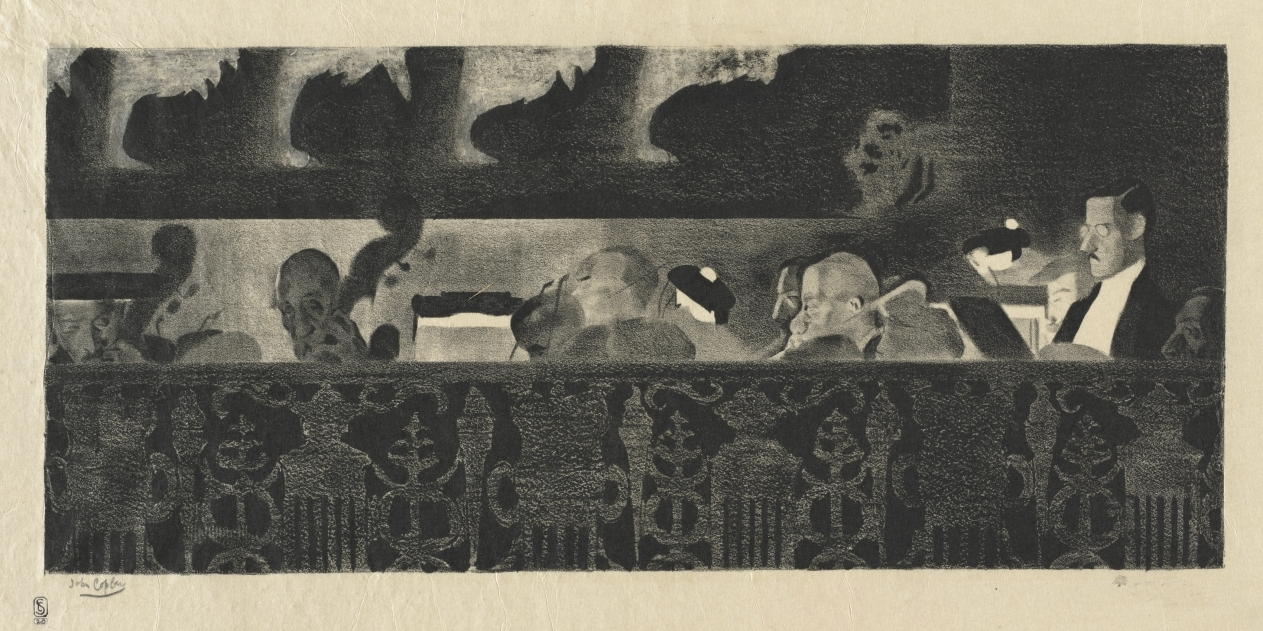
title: Musicians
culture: England, 20th century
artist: John Copley (British, 1875–1950)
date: 1910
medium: lithograph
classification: Print